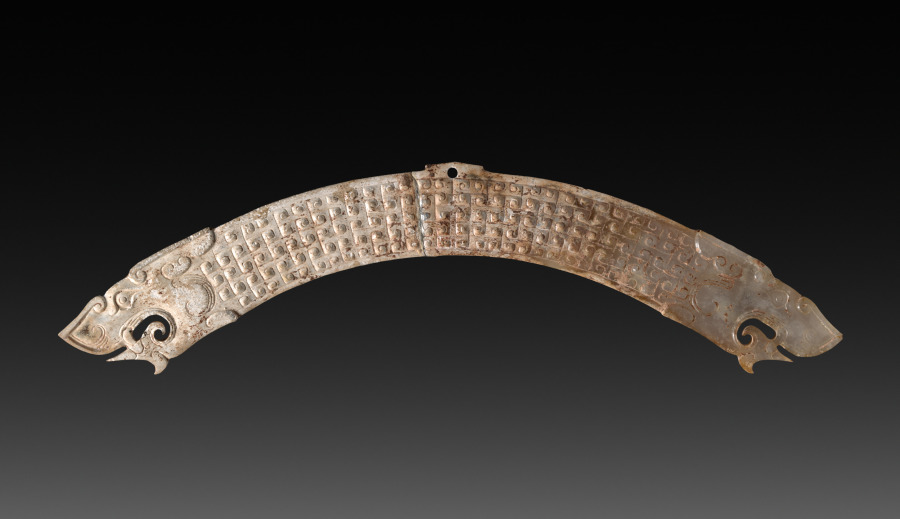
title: Arc-Shaped Pendant (Huangpei)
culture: China, Eastern Zhou dynasty (770–256 BCE), Warring States period (475–221 BCE)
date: c. 400–300 BCE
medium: jade (nephrite)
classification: Jade